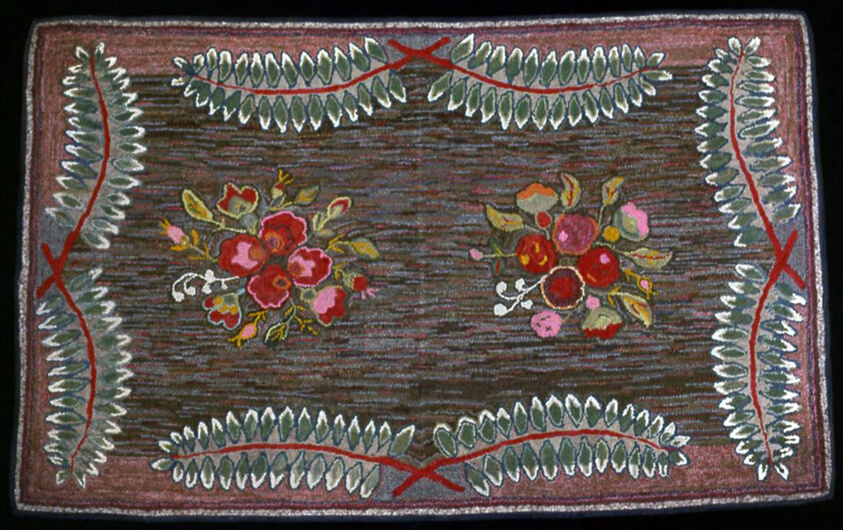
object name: Textile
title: Rug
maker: United States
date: 19th century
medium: Variety of fibers, plain weave with variety of fibers, yarns, felted, knitted, oblique interlaced and/or woven strips, forming "hooked" pile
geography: United States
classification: textile; needlework - rug